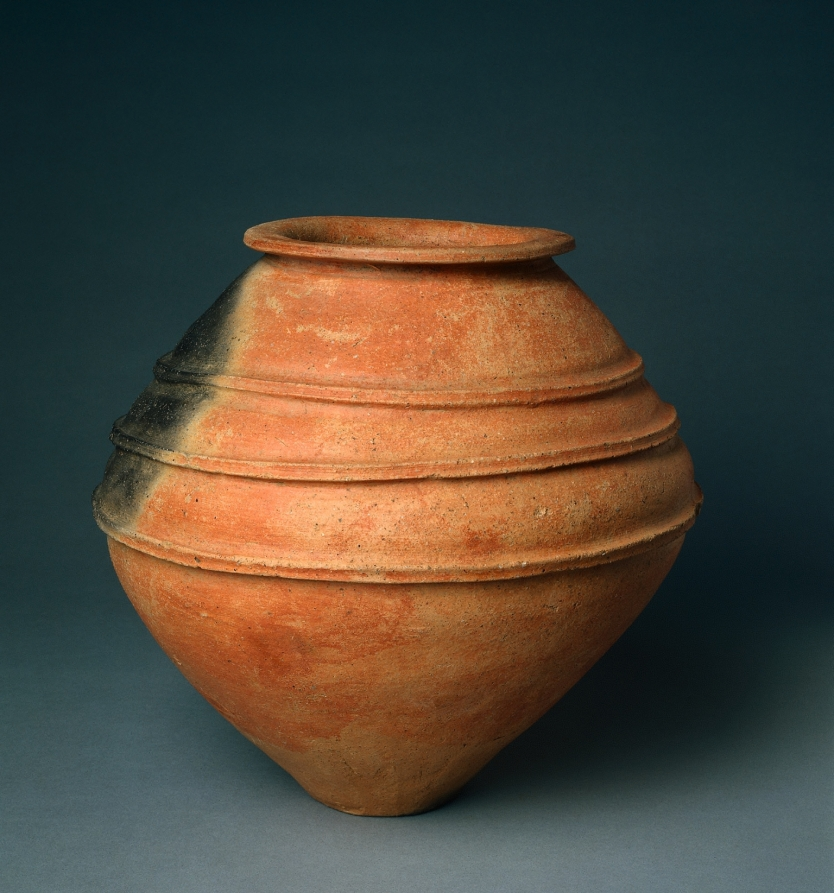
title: Jar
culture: Japan, Yayoi period (c. 300 BCE–300 CE)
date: c. 100 BCE–100 CE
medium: burnished earthenware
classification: Ceramic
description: The banding around this jar’s upper portion is an unusual feature for Yayoi pottery, which usually has a flat surface. It was likely made in western Japan, between Seto in Aichi prefecture and Kyushu, the southernmost main island. It is not believed to be a cooking vessel, but may have been used for storage. The ash spots occurred naturally during firing.